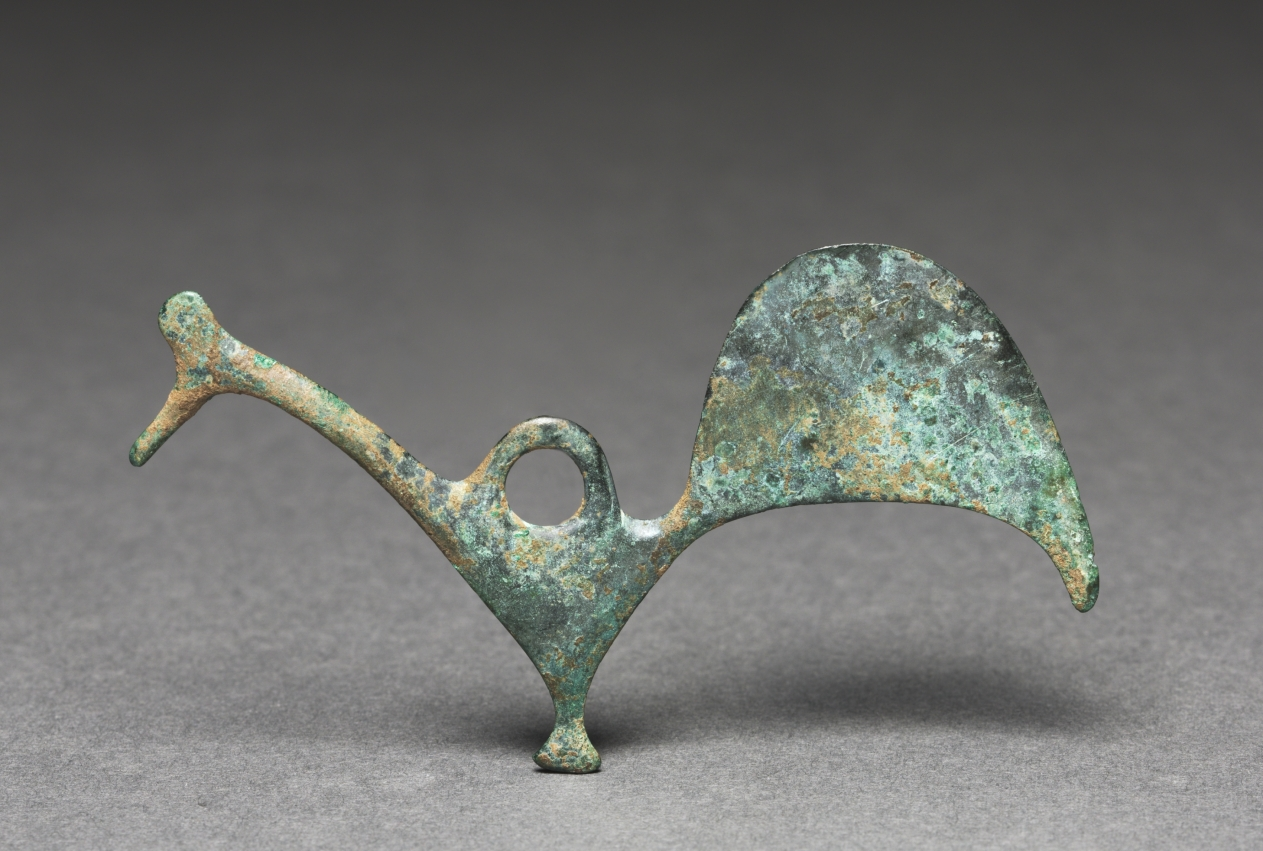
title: Pendant of a Bird (Rooster?)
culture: Northern Greece, Macedonian, Geometric period (900-700 BCE)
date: 700s–600s BCE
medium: bronze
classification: Jewelry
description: Although quite schematic, the subject of this pendant is easily recognizable as a bird, likely a rooster. Cleverly designed to hang evenly from its central suspension loop, it comprises three main parts: long neck terminating in a head with a pointy beak and small crest; triangular body with stylized feet; and broadly arched tail feathers.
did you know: The green patina of this bronze bird pendant is a result of oxidation.